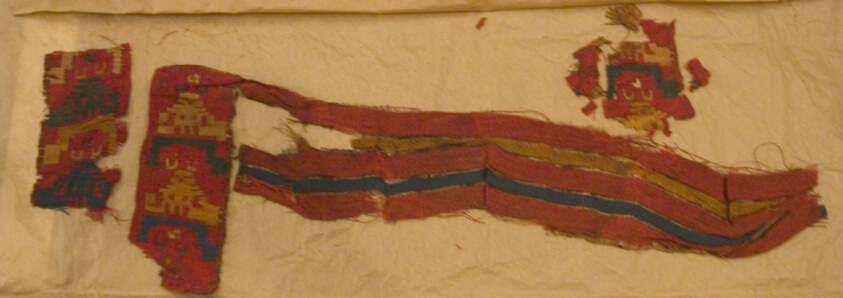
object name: Textile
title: Fragments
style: nazca, andean, andes, Pre-Columbian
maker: Possibly Nazca-Wari; Peru, south coast, Possibly Nazca Valley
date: A.D. 700/900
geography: Peru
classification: textile; weaving